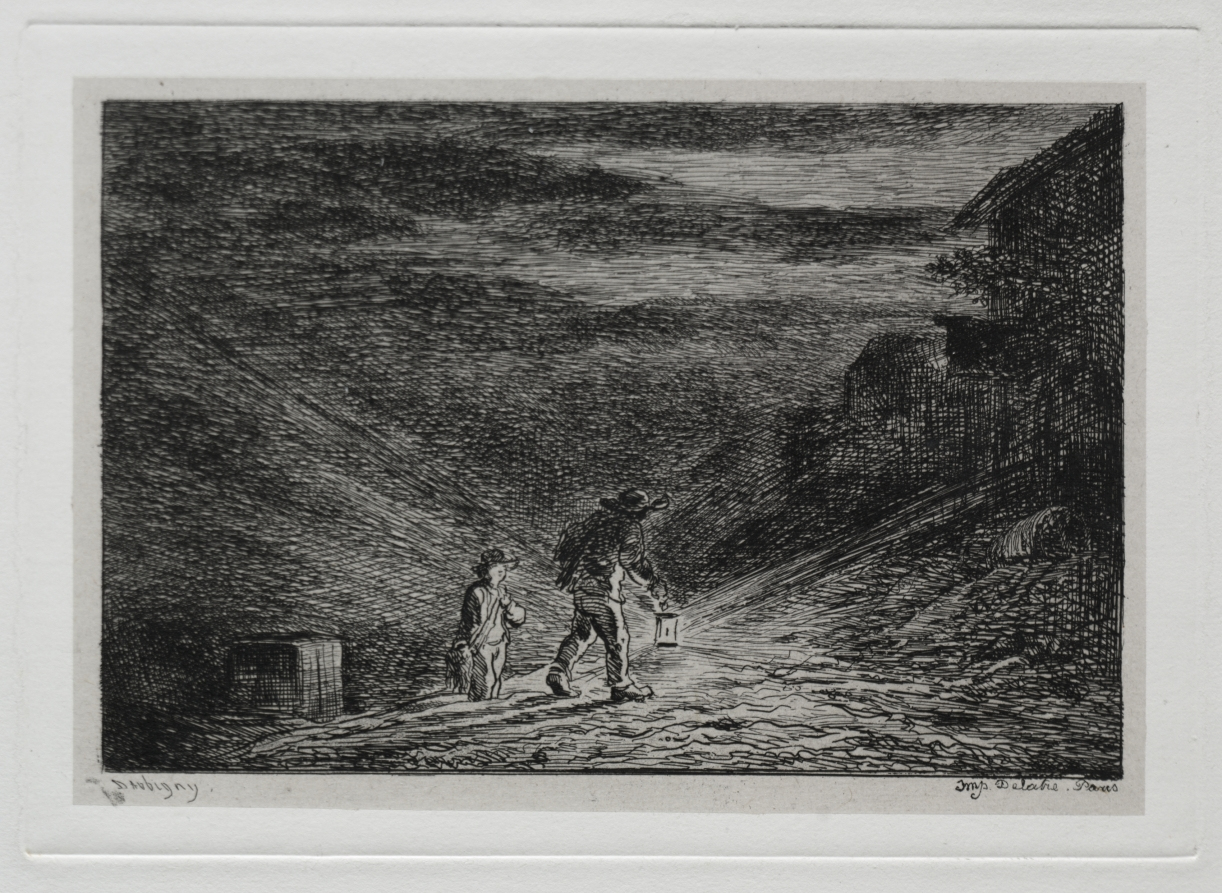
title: The Boat Trip: The Search for an Inn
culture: France, 19th century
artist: Charles François Daubigny (French, 1817–1878)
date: 1861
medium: wove paper with chine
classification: Portfolio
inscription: lower left corner in graphite: L. D. 106